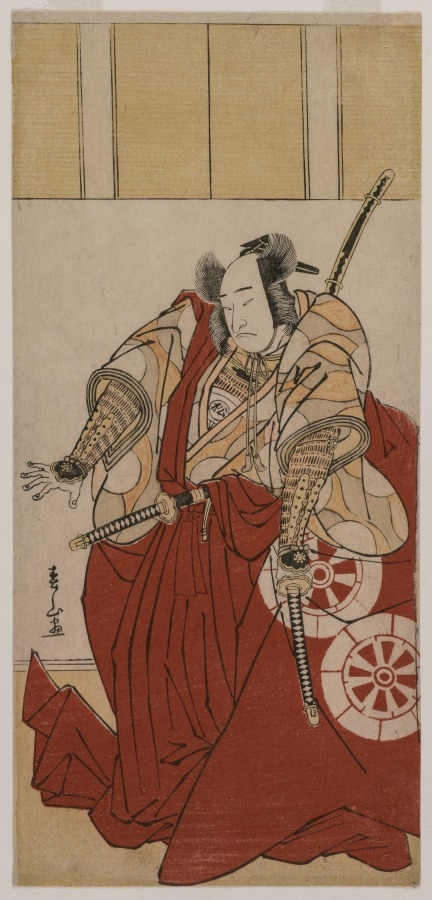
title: Onoe Matsusuke as Usui Sadamitsu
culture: Japan, Edo period (1615–1868)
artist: Katsukawa Shunzan (Japanese, active c. 1782–98)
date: 1781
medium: One of a triptych of color woodblock prints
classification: Print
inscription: Signature: Shunzan ga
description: This print is part of a triptych (a composition of three prints) that shows actors portraying three of the four famed protectors of imperial regent Minamoto Yorimitsu (948?–1021). Collectively, they are known as his Shitennō (四天王), or “Four Heavenly Kings,” after the Buddhist deities who guard the four cardinal directions. The characters are indicated by the large house crests on their robes. The actor Onoe Matsusuke I’s identity is revealed by a fan with the ideograph matsu (松), or “pine,” tucked into his robe, just against his breastplate.